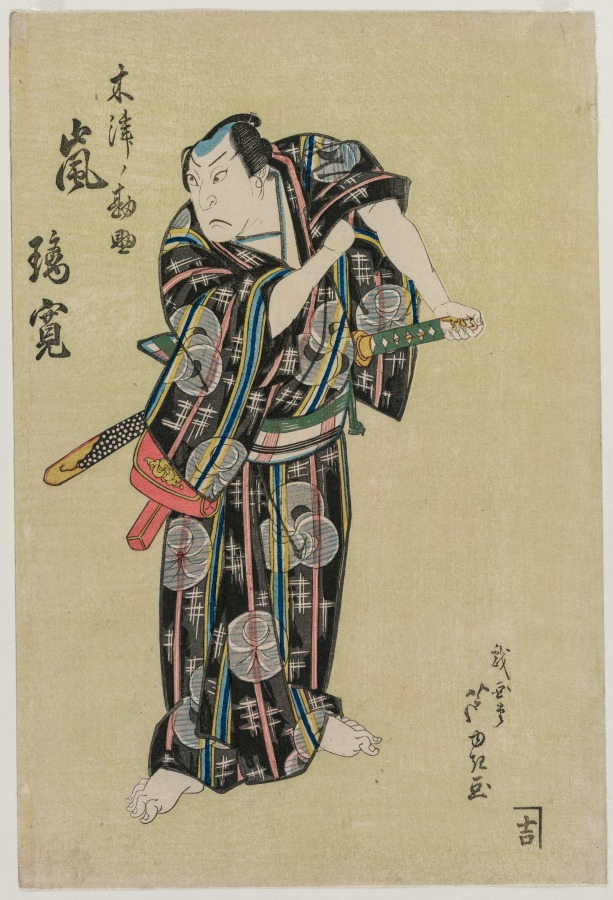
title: Arashi Rikan II as Kizu Kansuke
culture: Japan, Edo period (1615–1868)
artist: Gigadō Ashiyuki (Japanese, active 1813–34)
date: 1829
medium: color woodblock print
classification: Print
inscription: Signature: Gigado Ashiyuki ga Publisher: Kichi (emblem)